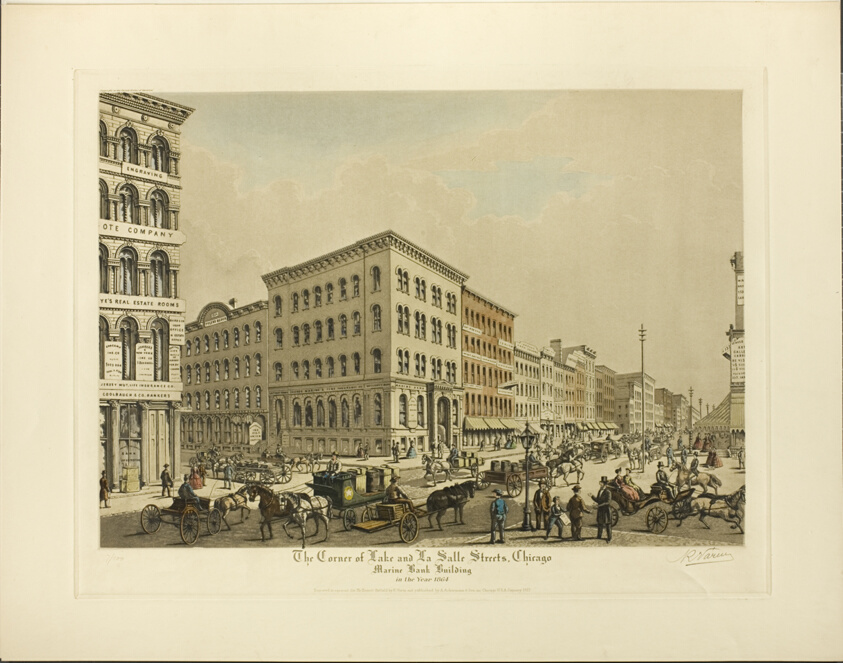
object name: Print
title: Corner of Lake and La Salle Streets, Chicago, Marine Bank Building in the Year 1864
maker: Raoul Varin (French, 1865-1943)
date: published January 1927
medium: Aquatint and etching in brown, with hand-coloring, on cream wove paper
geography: France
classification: aquatint; print; prints and drawing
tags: Chicago